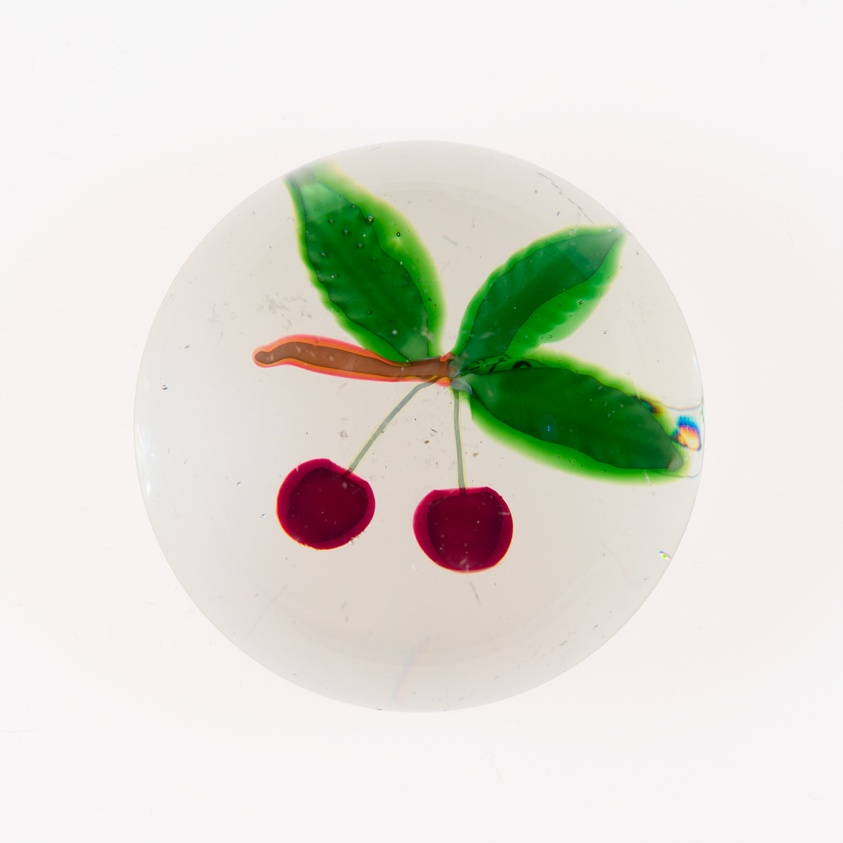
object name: Glass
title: Paperweight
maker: Saint-Louis Glassworks (Cristalleries de Saint-Louis); Lorraine, France, founded 1586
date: 19th century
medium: Glass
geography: Saint-Louis-lès-Bitche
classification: paperweight; lampwork; european decorative arts; glass